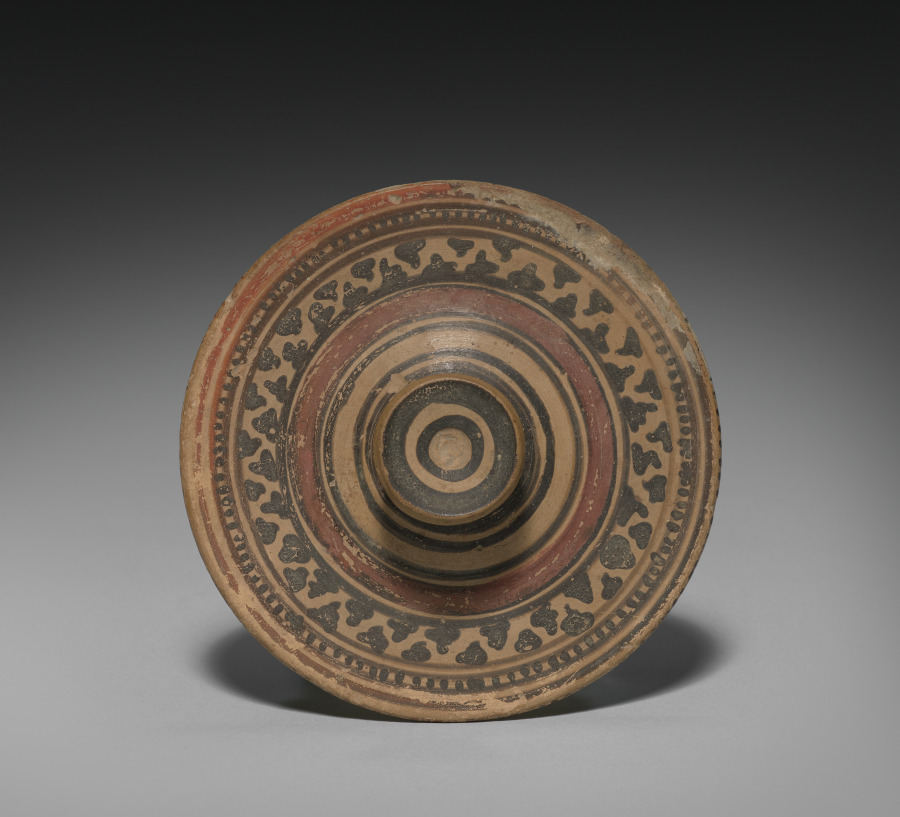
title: Corinthian Vase (lid)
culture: Greece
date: 600s BCE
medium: earthenware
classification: Ceramic